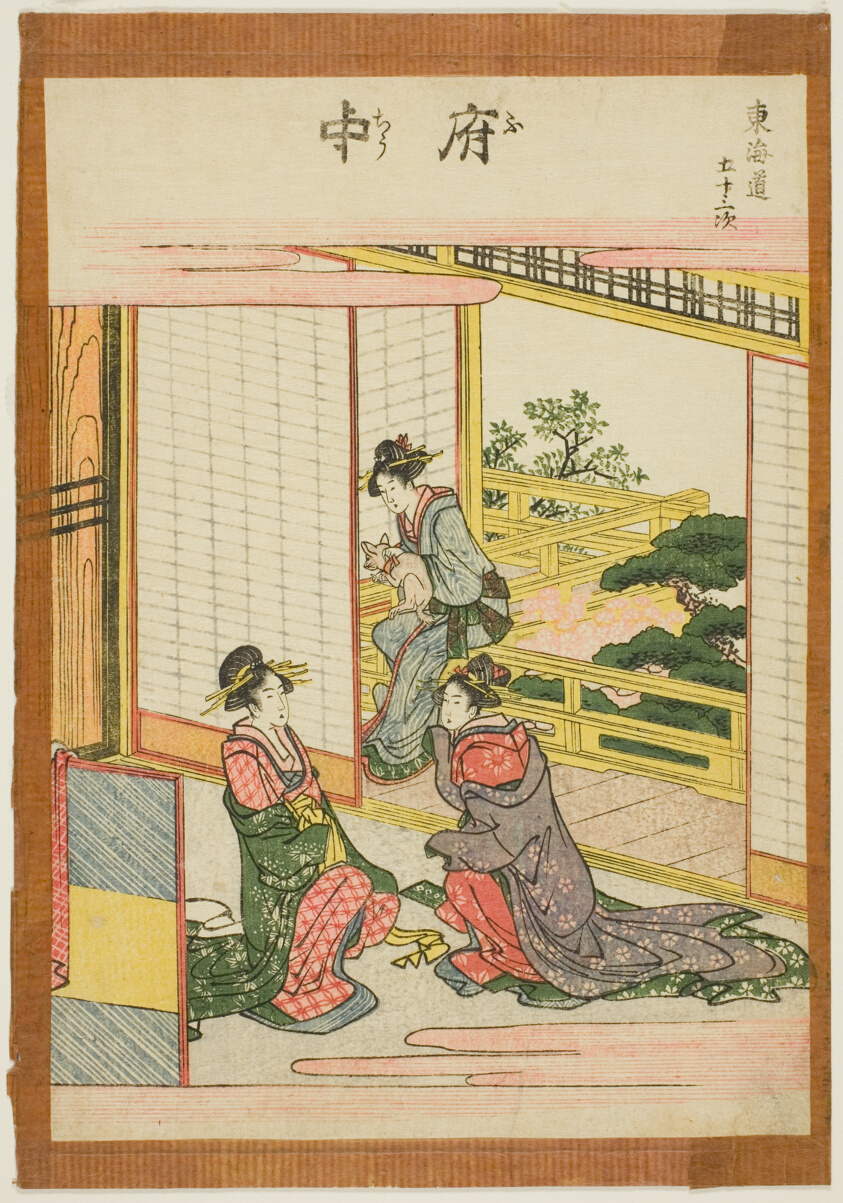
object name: Print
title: Fuchu, from the series "Fifty-three Stations of the Tokaido (Tokaido gojusan tsugi)"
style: Japanese (culture or style)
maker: Katsushika Hokusai 葛飾 北斎; Japanese, 1760-1849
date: c. 1806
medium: Color woodblock print; chuban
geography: Japan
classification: woodblock print; print; asian art